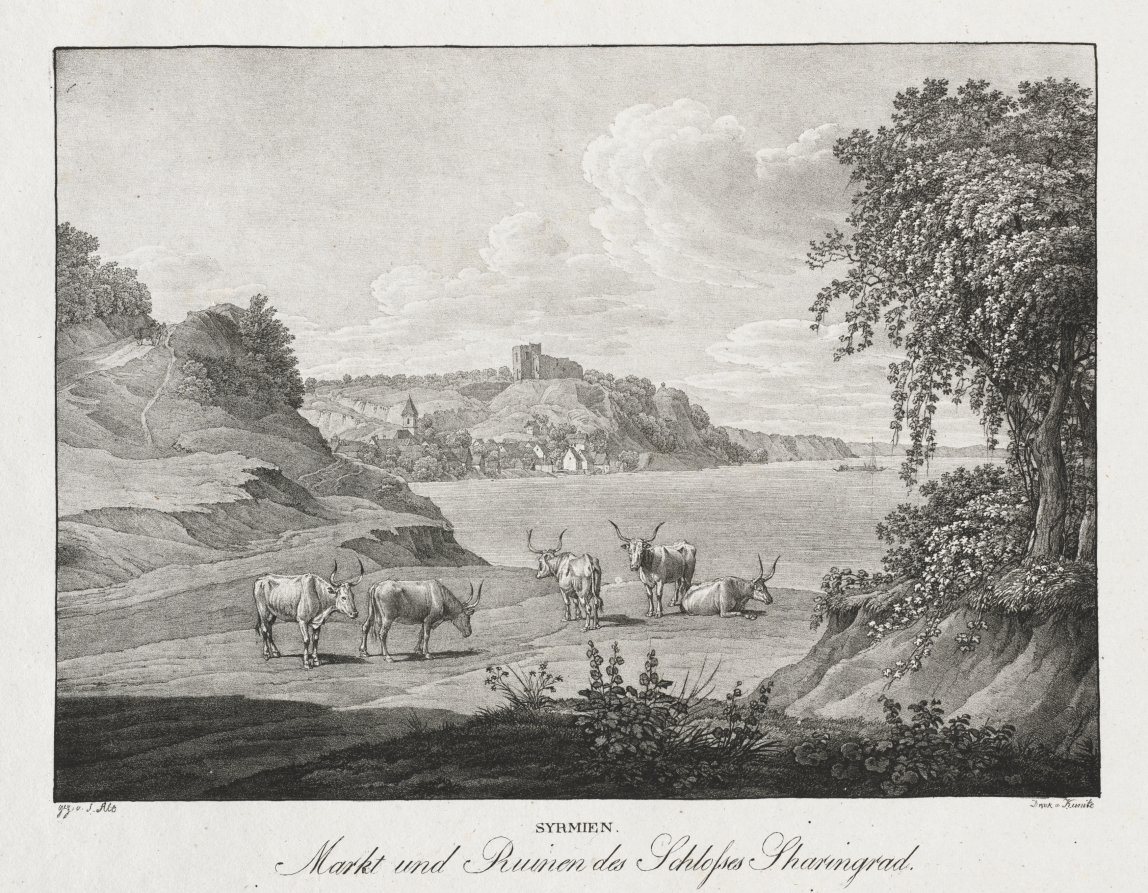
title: Syrmien, Markt und Ruinen des Schlosses Sharengrad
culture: Austria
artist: Jakob Alt (Austrian, 1789–1872)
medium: lithograph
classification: Print